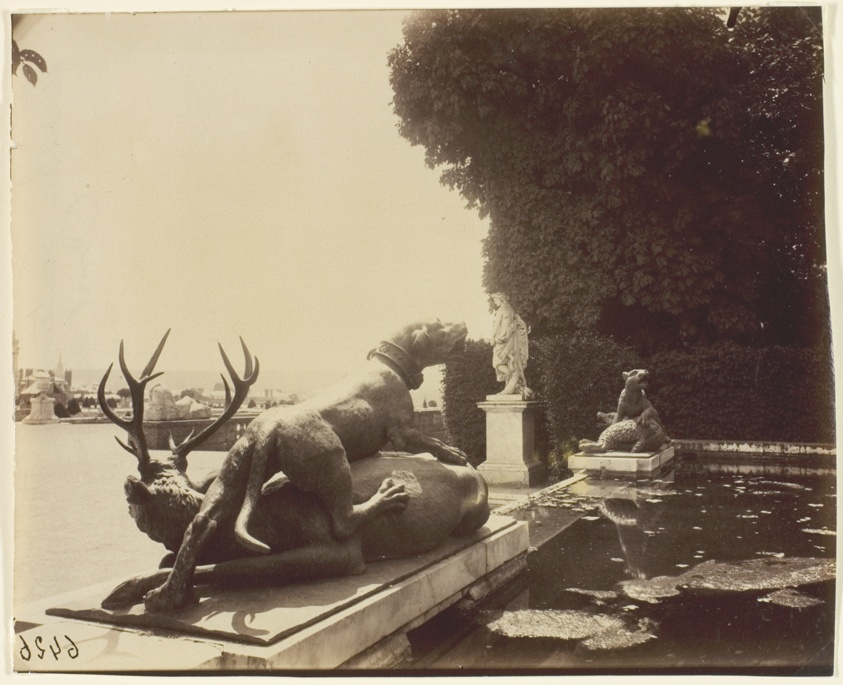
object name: Photograph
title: Versailles, Fontaine du Point du Jour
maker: Jean-Eugène-Auguste Atget (French, 1857–1927)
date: 1903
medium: Albumen print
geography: France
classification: albumen silver print; photographic process; photography; photograph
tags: Collected by Hugh Edwards